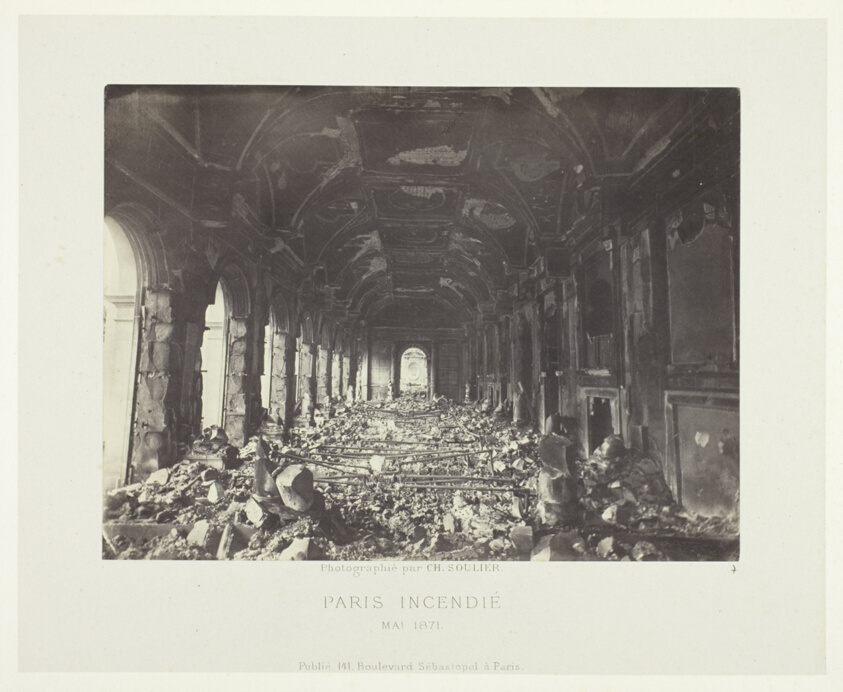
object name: Photograph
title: Paris Fire (Great Hall of the State Council), from the series "Paris Incendié"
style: 19th century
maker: Charles Soulier (French, 1840–1875)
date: May 1871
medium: Albumen print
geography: France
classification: gelatin silver (developing-out-paper) pr; photographic process; photography; photograph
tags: Collected by Hugh Edwards, Paris